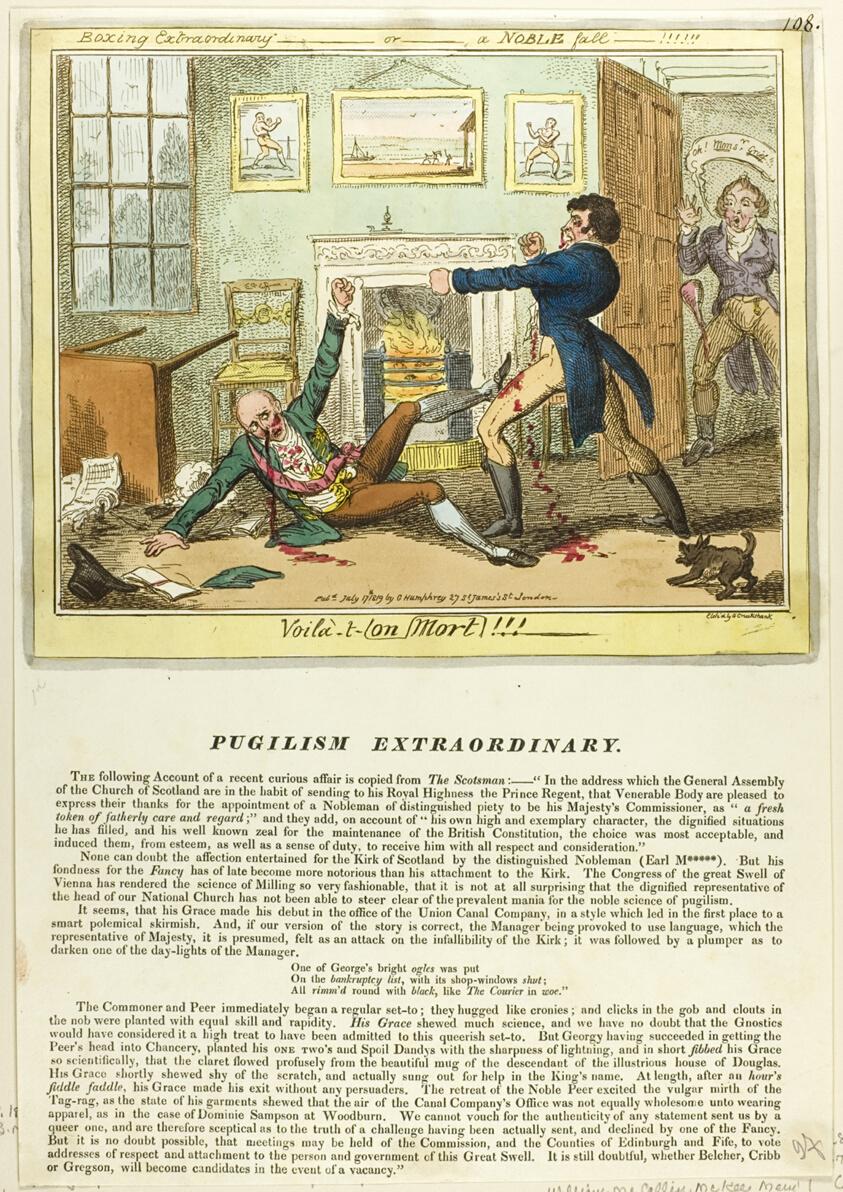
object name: Print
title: Voila-t-on Mort!!!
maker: George Cruikshank (English, 1792-1878); published by George Humphrey (English, c. 1773-1831)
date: published July 17, 1819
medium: Hand-colored etching and letterpress on paper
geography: England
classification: etching; print; prints and drawing